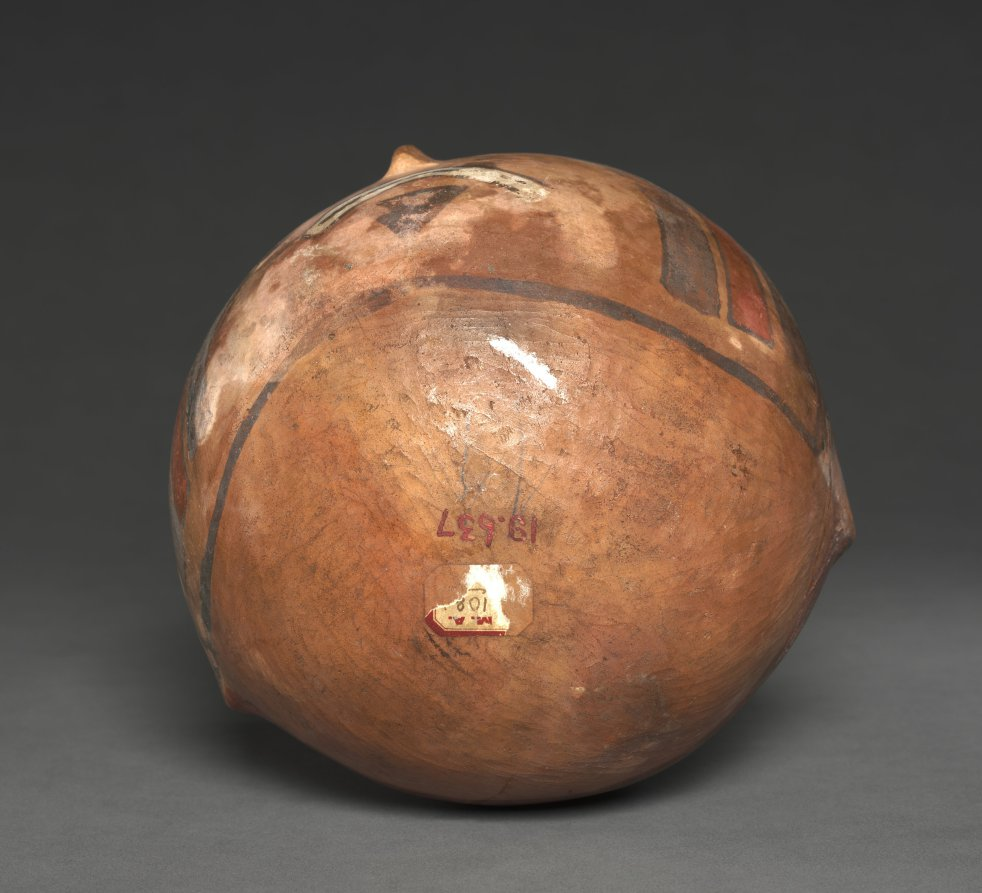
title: Vase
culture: Peru, South Coast, Nasca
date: c. 300–500 CE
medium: pottery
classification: Ceramic